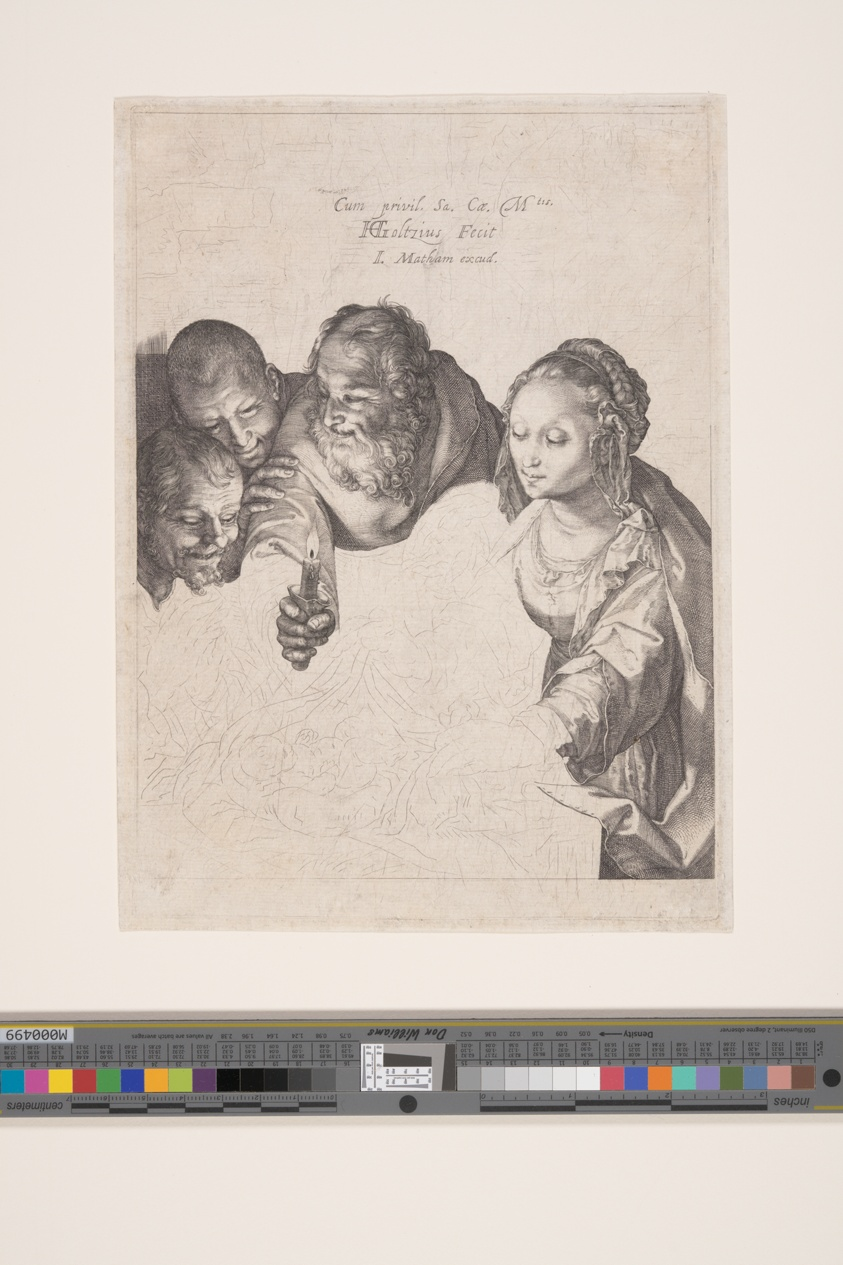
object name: Print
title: The Adoration of the Shepherds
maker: Hendrick Goltzius (Dutch, 1558–1617)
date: c. 1599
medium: Engraving on laid paper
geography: Netherlands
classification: engraving; paper; print; prints and drawing